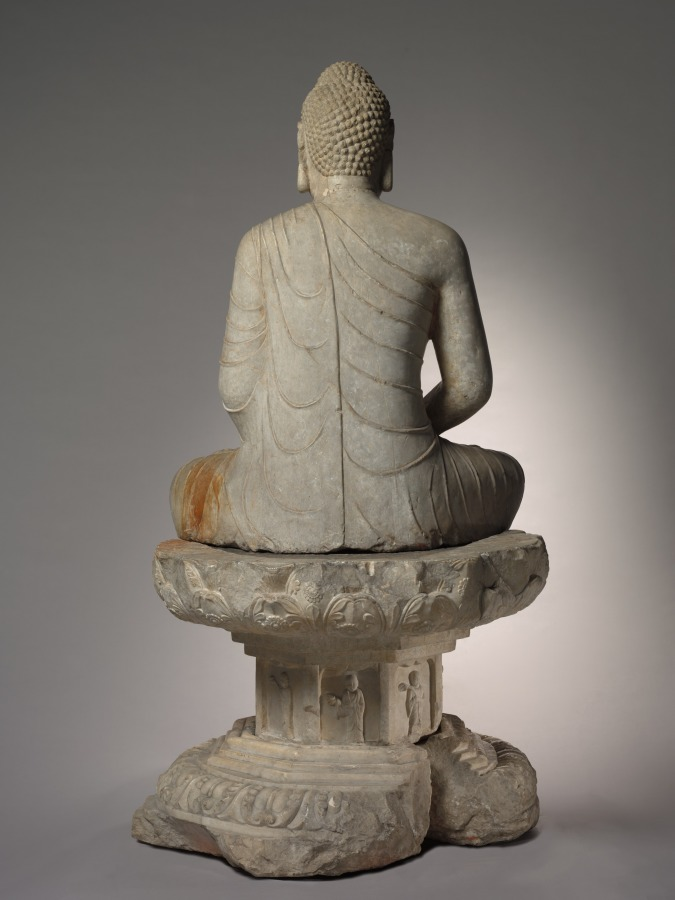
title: Seated Amitayus Buddha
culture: China, Northern Qi dynasty (550-577)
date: c. 570s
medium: marble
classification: Sculpture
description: Amitayus, the Buddha of Infinite Life, is seated in meditation on a double lotus pedestal. The pedestal was not made with the statue but the combination is faithful to the original artistic conception. The statue is an extremely rare example of a major type of Northern Qi Buddhist sculpture. The heavy, massive front highlights the sense of monumentality and the spiritual essence of the Buddha. Today the sculpture is united with a pedestal that exhibits the rich, ornate style of early Tang sculpture. It was commissioned by the Duke of Liang, Fang Xuanling (578–648), for the blessing of his second son and daughter-in-law, the Tang imperial princess of Gaoyang. The iconography and inscription suggest that it originally went with a statue, now missing, of Shakyamuni, the historical Buddha, instead of Amitayus.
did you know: The stringlike folds of the Buddha's draperies emphasize his monumental, rigidly erect torso and tubular limbs.